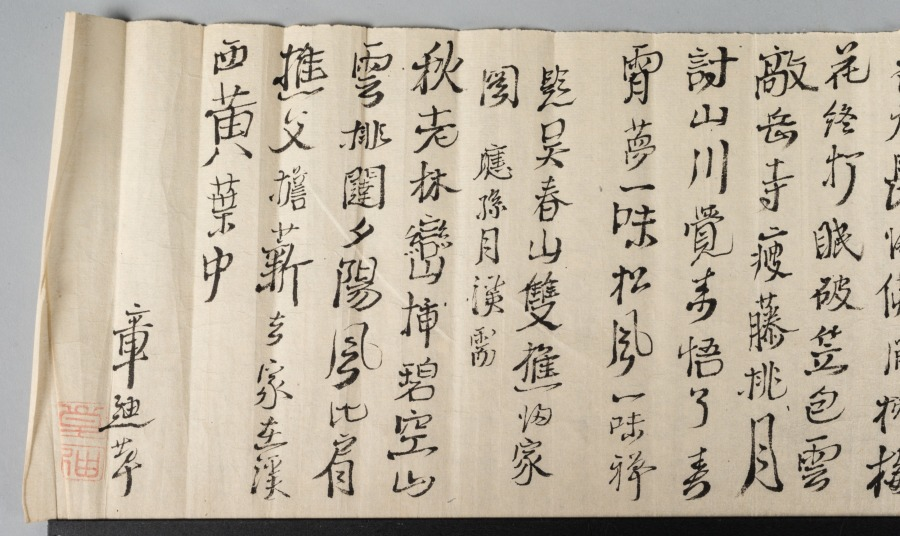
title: Happy Forest, from Water Margin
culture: Japan, Edo period (1615–1868)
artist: Matsumura Goshun (Japanese, 1752–1811)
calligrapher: and Amenomori Shōteki (Japanese, 1731–1786)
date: late 1700s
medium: hanging scroll; ink and color on paper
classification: Painting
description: The Chinese literary classic Water Margin is set in the 1120s and tells the story of 108 outlaws who first rebel against the government and then join forces with it. This painting depicts an episode in which hero Wu Song reclaims the tavern Happy Forest for its rightful owner, the prison warden’s son, Shi En. To prepare for the fight, Wu Song drinks a lot of wine. The painting was inscribed with a quote in which an ally describes Wu Song’s fighting style. It reads as follows: Where his twin fists rise, clouds and thunder roar, When his flying kick comes, wind and rain tremble.